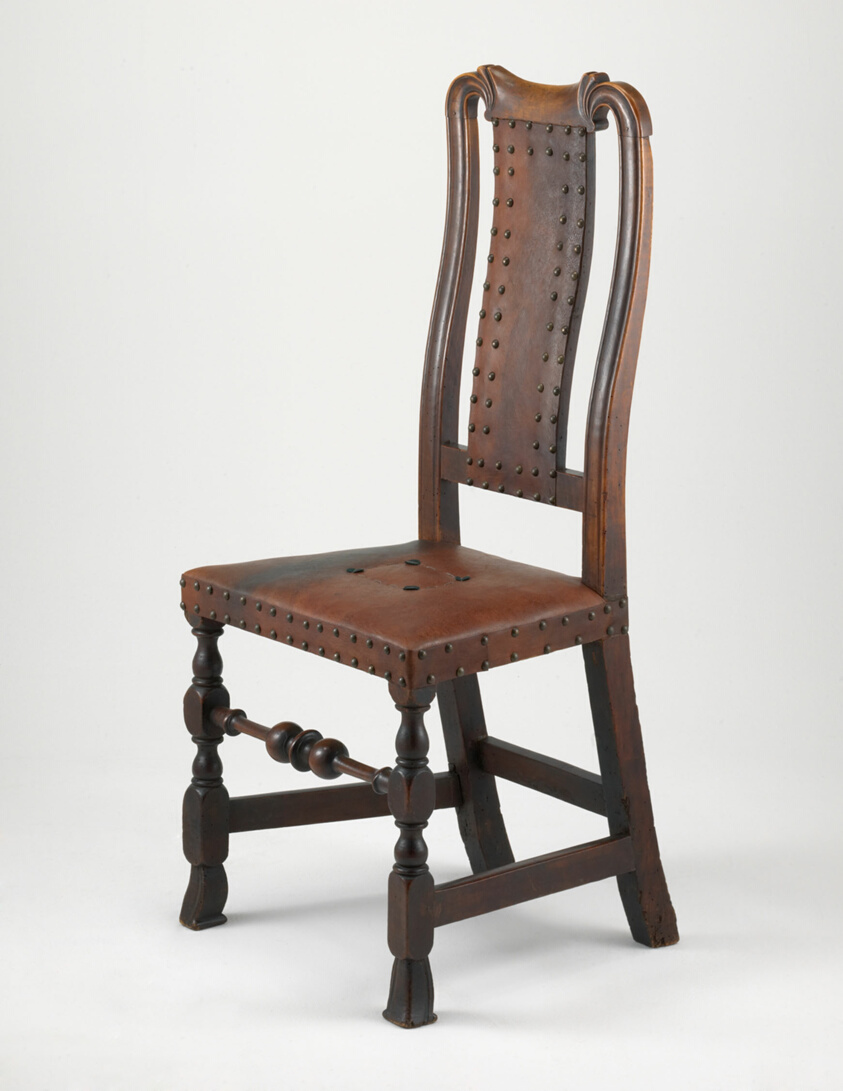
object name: Furniture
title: Side Chair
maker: Artist unknown (American, 18th century); Newport, Rhode Island or Boston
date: 1722–44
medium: Maple and leather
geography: Newport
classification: seating; furniture; american decorative arts; american arts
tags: furniture